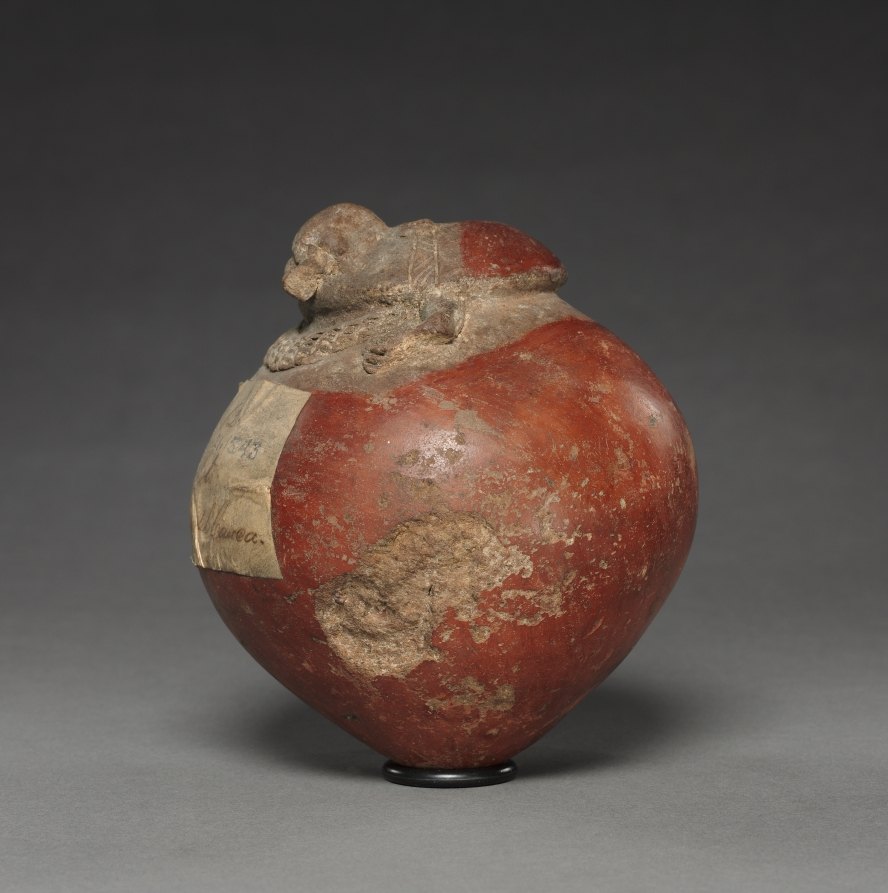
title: Dish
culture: Colombia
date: before 1550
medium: pottery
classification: Ceramic